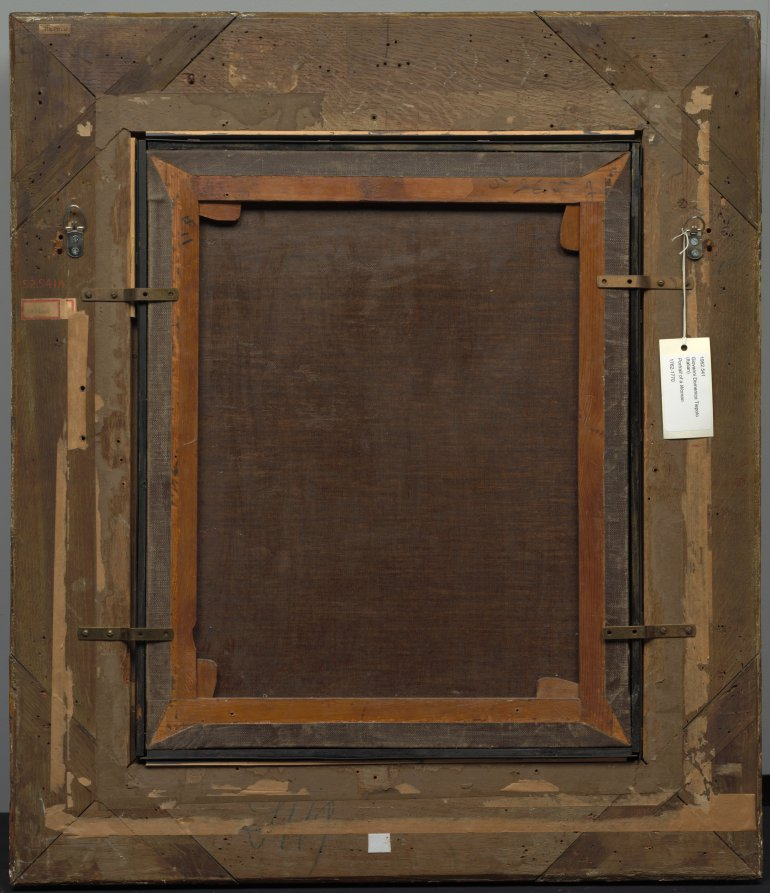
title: Portrait of a Woman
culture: Italy, 18th century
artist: Giovanni Domenico Tiepolo (Italian, 1727–1804)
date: 1762–1770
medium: oil on canvas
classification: Painting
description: This portrait was made in Spain, where the artist (the son of Giambattista Tiepolo, the great Venetian fresco painter) lived between 1762 and 1770.